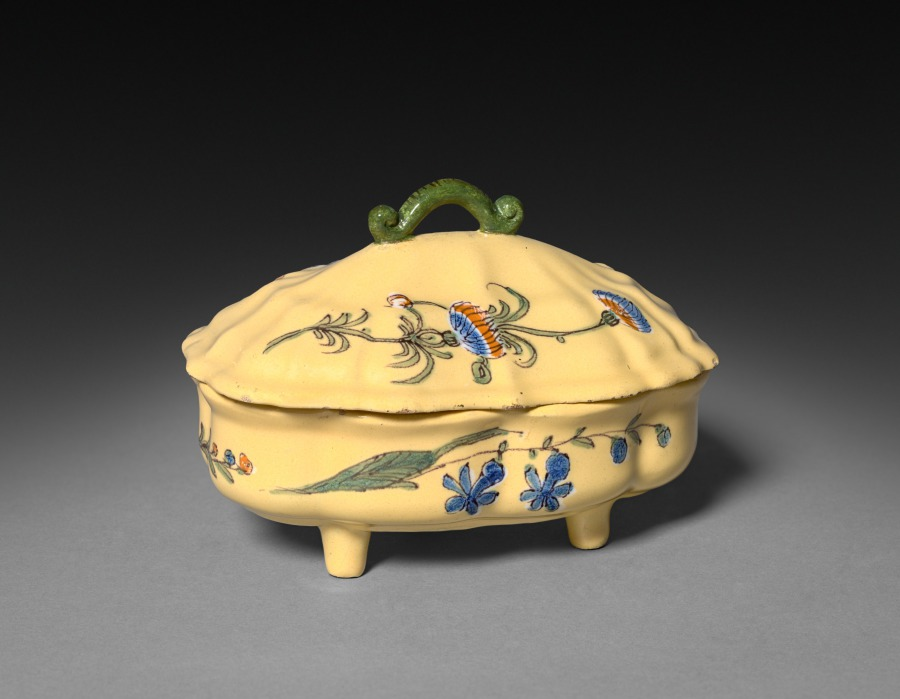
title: Covered Spice Bowl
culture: France, Montpellier, 18th century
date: c. 1775–80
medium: faience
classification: Ceramic